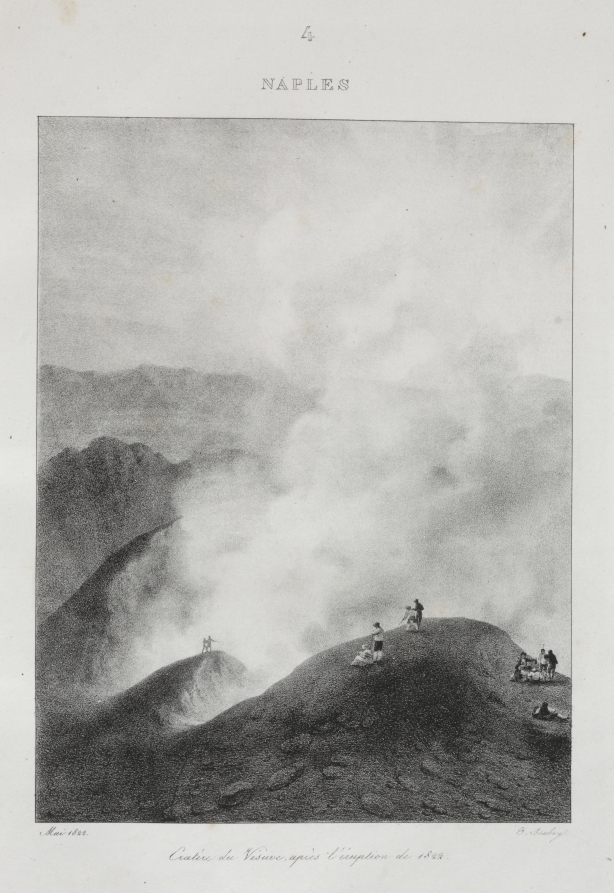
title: Voyage en Italie en 1822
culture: France, 19th century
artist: Jean-Baptiste Isabey (French, 1767–1855)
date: 1833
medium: lithograph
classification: Bound Volume